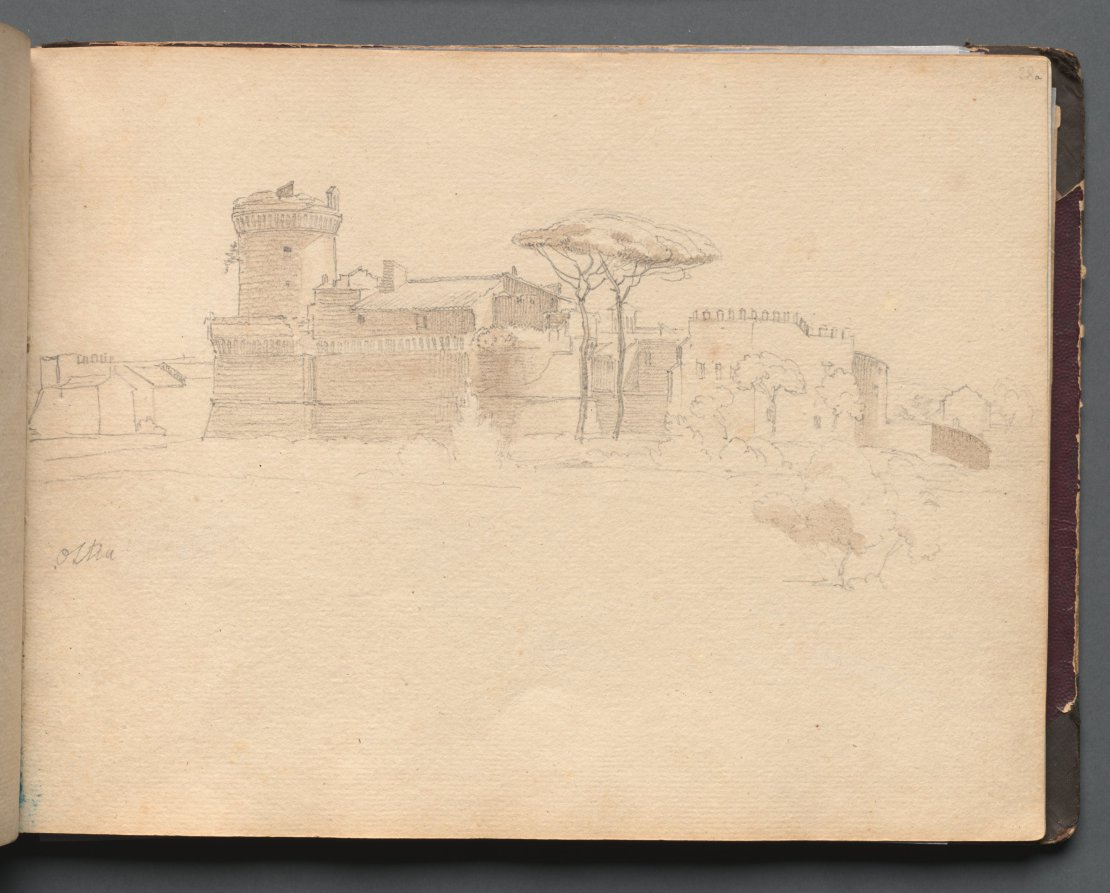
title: Album with Views of Rome and Surroundings, Landscape Studies, page 28a: "Ostia"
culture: Germany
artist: Franz Johann Heinrich Nadorp (German, 1794–1876)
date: c. 1830s-70s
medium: graphite with brown wash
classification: Bound Volume